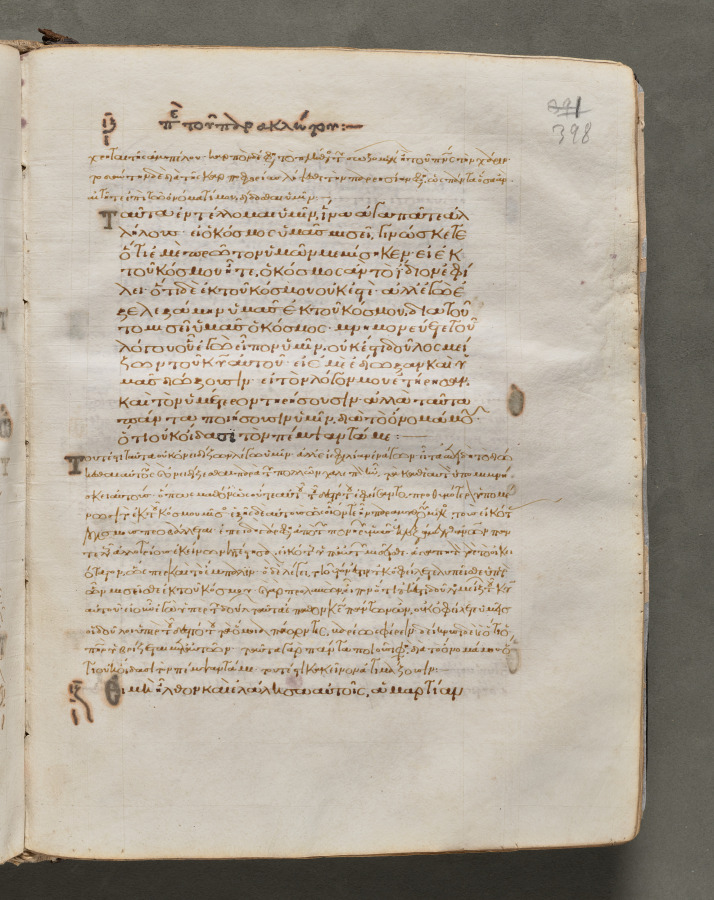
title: Text, folio 398 (recto), from a Gospel Book with Commentaries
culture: Byzantium, Constantinople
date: c. 1000–1100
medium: ink, tempera, and gold on vellum; leather binding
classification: Bound Volume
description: Each of the four gospels in this book opens on a page with brilliantly illuminated borders depicting the author of the text as well as birds—principally peacocks, symbols of the immortality of the soul—and fountains, representing the fountain of life and the salvation of the soul. This volume consists of 428 leaves with texts in Greek. Its level of sophistication suggests that it was probably written and decorated in a monastery in Constantinople.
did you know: Gospel books were carried in procession through Byzantine churches.